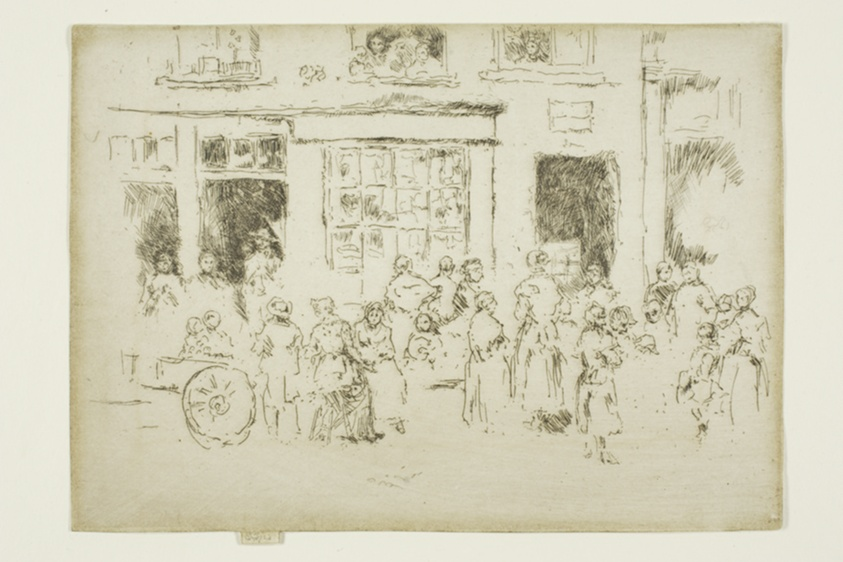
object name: Print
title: High Street, Brussels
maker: James McNeill Whistler (American, 1834-1903)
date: 1887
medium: Etching with foul biting in black ink on ivory laid paper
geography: United States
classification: etching; foul biting; print; prints and drawing; paper